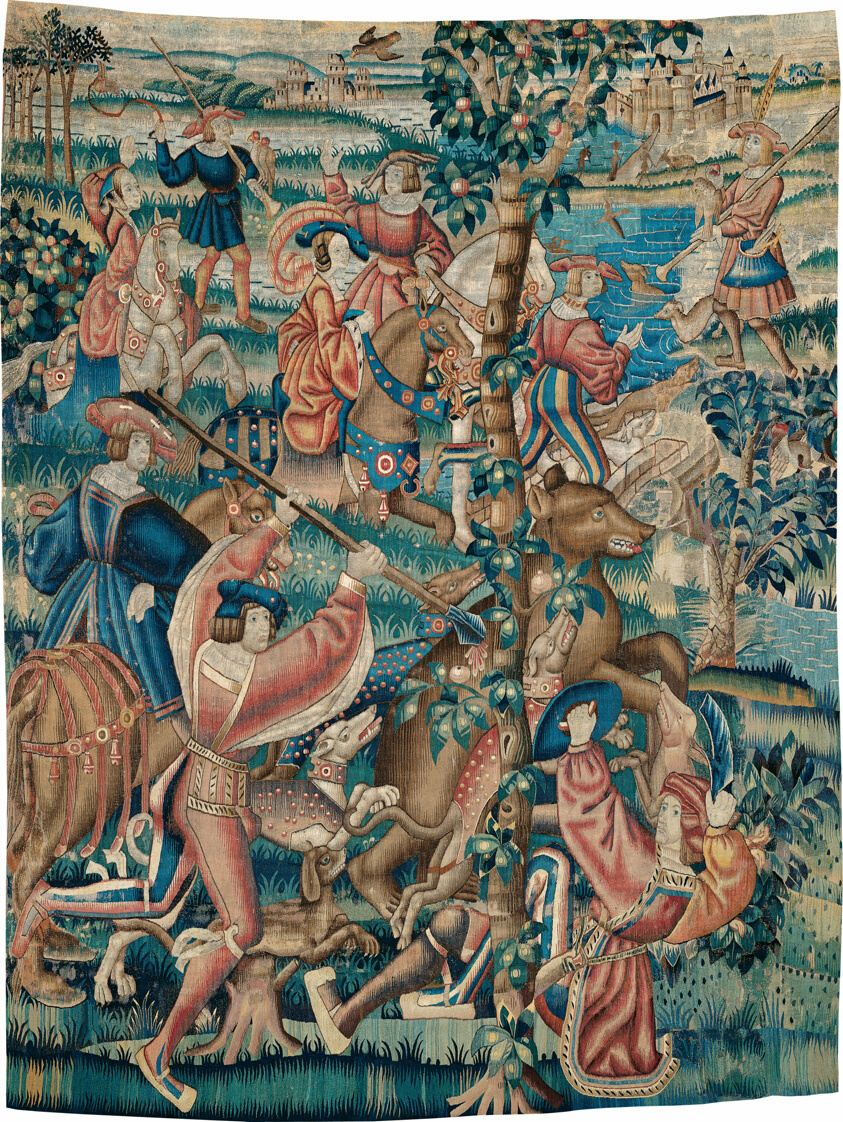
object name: Textile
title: Tapestry (Bear Hunt and Falconry from a Hunts Series)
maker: Franco-Flemish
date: c. 1525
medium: Wool and silk; slit and single and double dovetailed tapestry weave. Warp: Count: 5–6 warps per cm; wool: S-ply of two Z-spun elements; diameter: 1.0 mm Weft: Count: varies from 16 to 24 wefts per cm; wool: S-ply of- two Z-spun elements; pairs of S-ply of two Z-spun elements; diameters: 0.3–1.5 mm; silk: three yarns of S-ply of two Z-twisted elements; diameters: 0.4–0.6 mm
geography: Belgium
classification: weaving - tapestry; textile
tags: dogs, animals